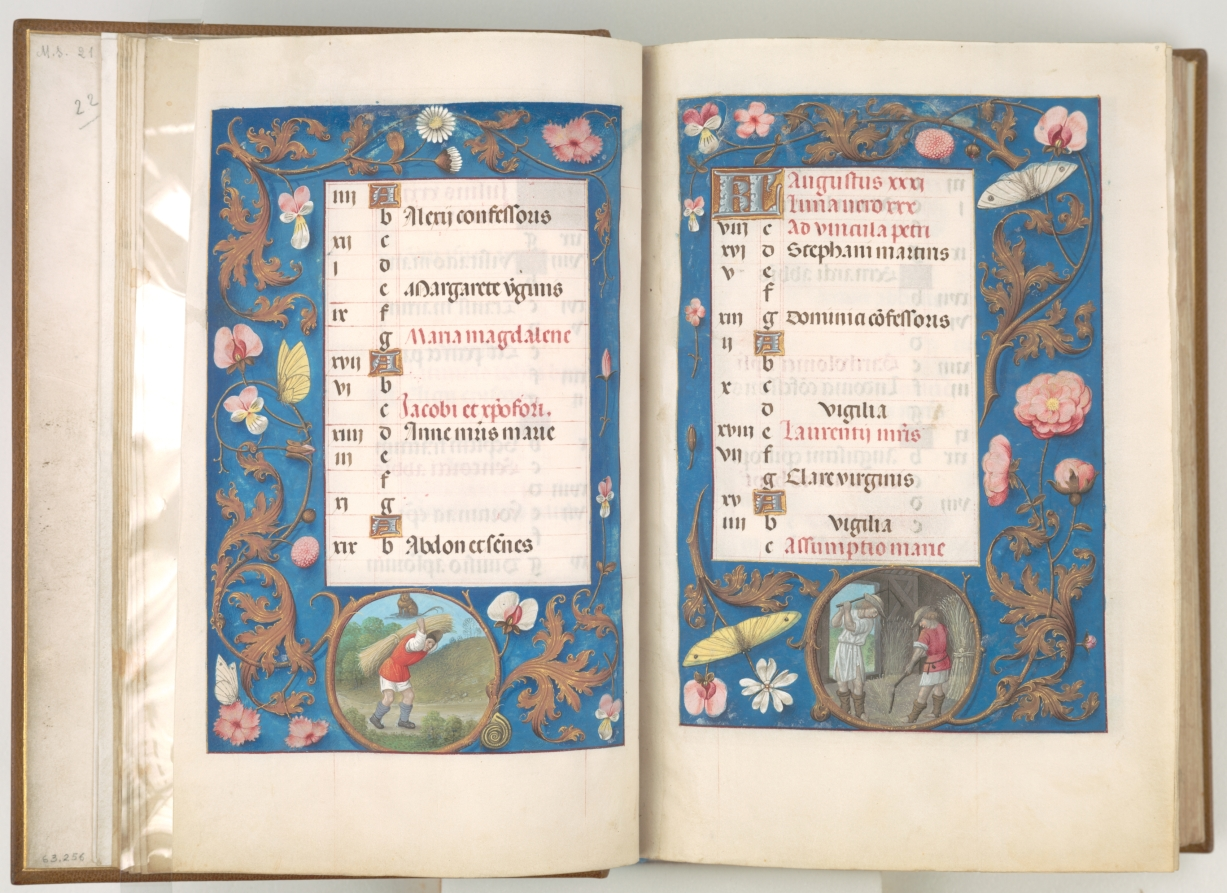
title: Hours of Queen Isabella the Catholic, Queen of Spain: Fol. 9r, August - Threshing Wheat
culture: Flanders, Ghent and Bruges, late 15th century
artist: Master of the First Prayerbook of Maximillian (Flemish, c. 1444–1519)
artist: and Associates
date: c. 1500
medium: ink, tempera, and gold on vellum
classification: Bound Volume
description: A great lover of Flemish art, Queen Isabella treasured her many devotional books. This deluxe manuscript was created for her private devotions by highly organized and distinctly talented manuscript painters active in Ghent and Bruges. The Ghent-Bruges school represents the culmination of Flemish book painting, whose main features were the use of rich colors, illusionistic effects, a love of landscape, and a strong sense of visual narrative. Manuscripts produced by this circle of artists are renowned for their border decoration featuring a rich variety of realistically painted flowers, scrolling acanthus leaves, birds, and butterflies.